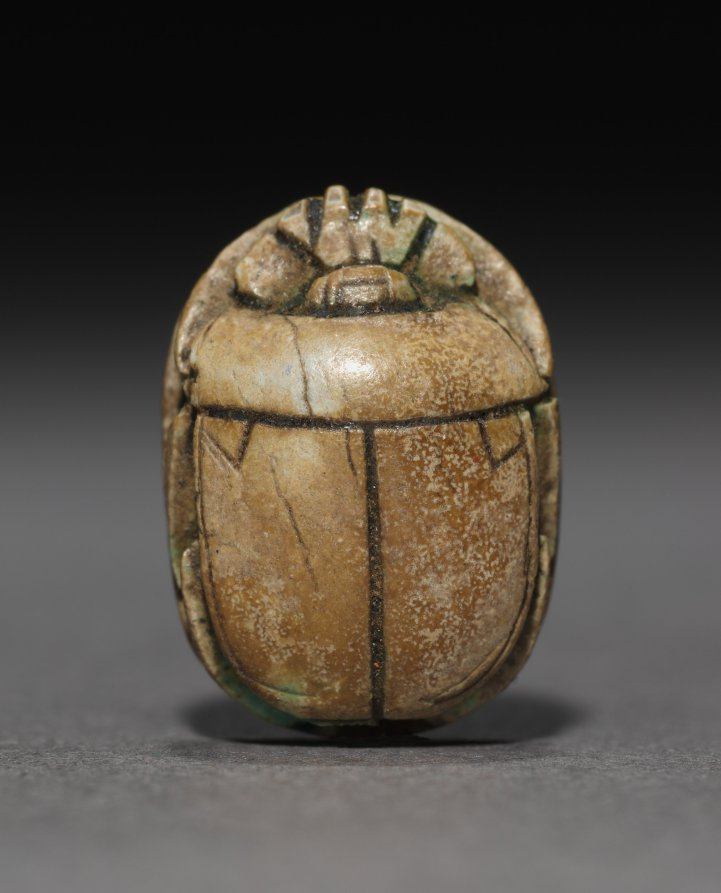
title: Amenhotep II Scarab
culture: Egypt, New Kingdom or modern forgery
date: 1550–1077 BCE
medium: steatite, traces of turquoise glaze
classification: Scarabs